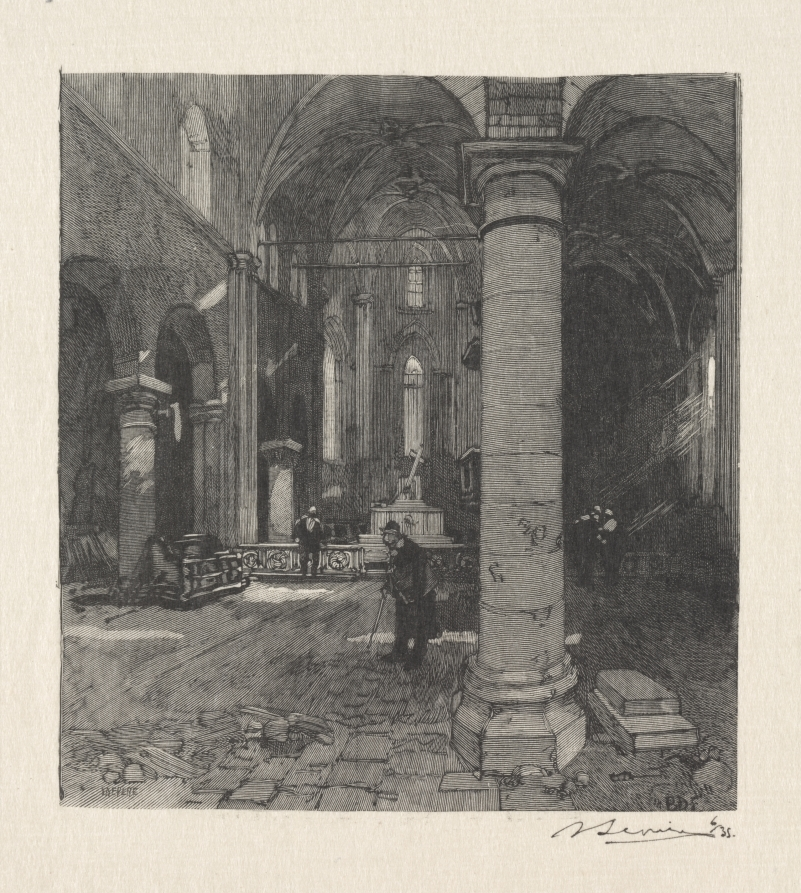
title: Interieur de l'Eglise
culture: France, 19th-20th century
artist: Auguste Louis Lepère (French, 1849–1918)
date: c. 1870–1918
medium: wood engraving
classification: Print